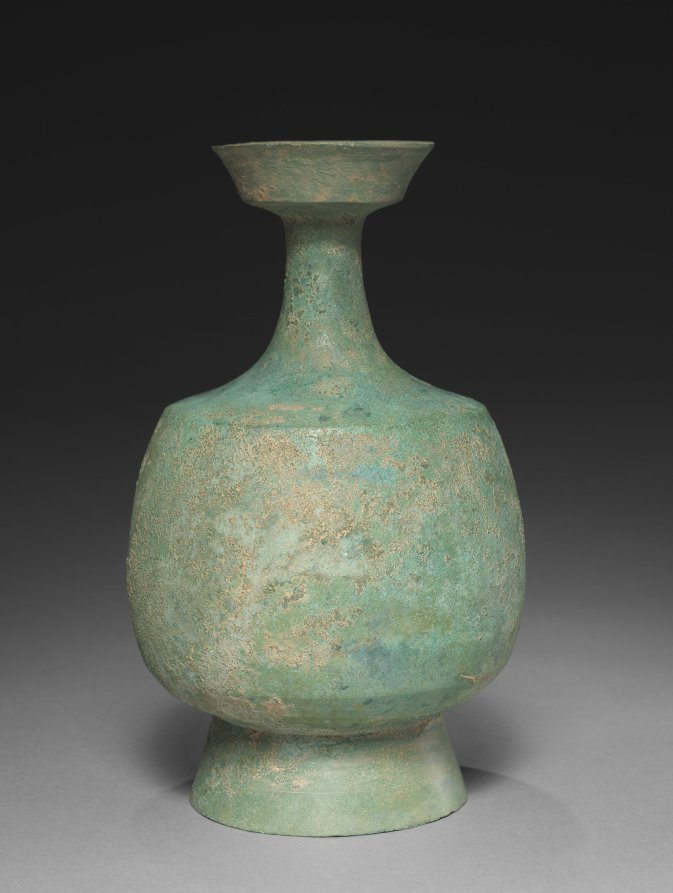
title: Wide-Mouthed Bottle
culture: Korea, Goryeo dynasty (918–1392)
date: 1100s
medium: bronze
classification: Metalwork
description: As early as the seventh century, the practice of drinking tea and wine became an important part of elite culture in Korea. Elites of the Goryeo period commissioned a variety of types of utensils and vessels made in both ceramic and bronze, including this handsome bronze wine bottle to make their drinking experience more exciting.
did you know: A bottle with a wide opening is one of the popular types for both bronze and celadon wares. Its ceramic counterpart is 1918.435.